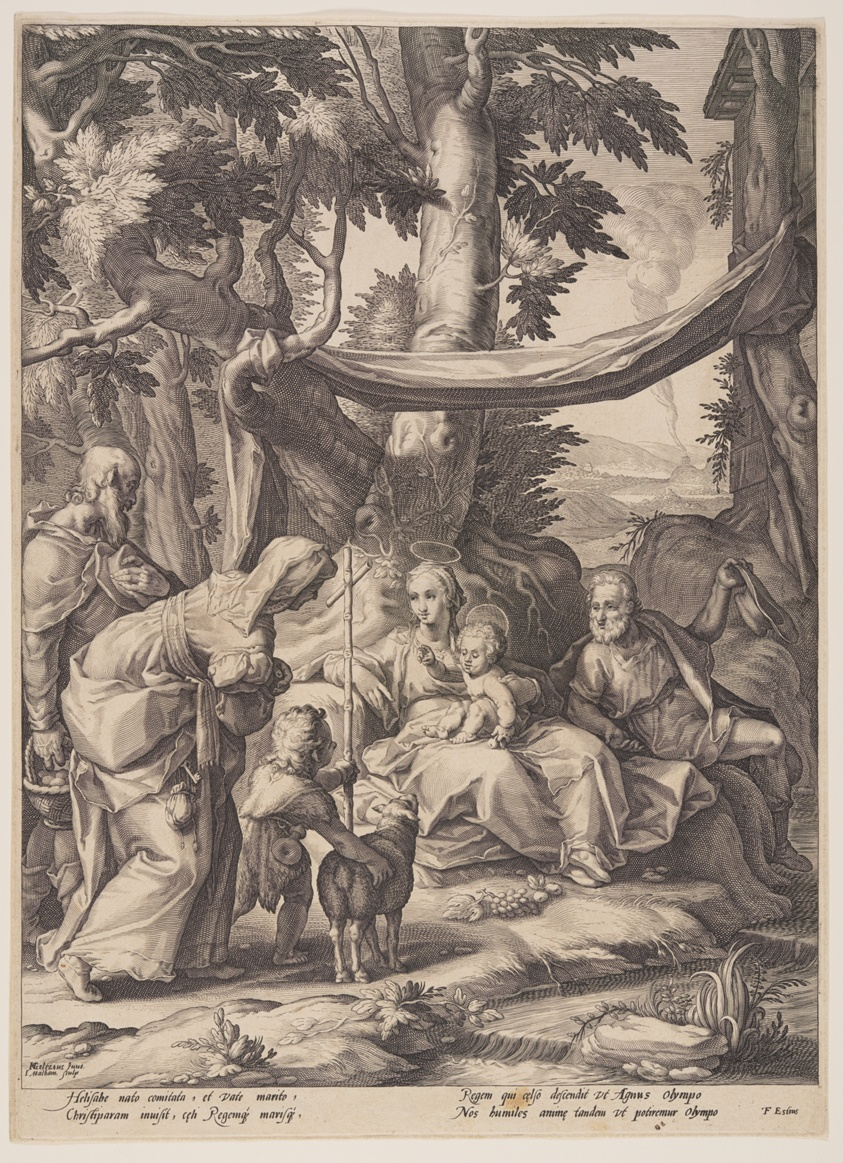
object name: Print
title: The Holy Family with Saints Elizabeth, Zacharias and John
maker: Jacob Matham (Dutch, 1571–1631); after Hendrick Goltzius (Dutch, 1558–1617)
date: 1590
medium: Engraving on ivory laid paper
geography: Netherlands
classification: engraving; paper; print; prints and drawing